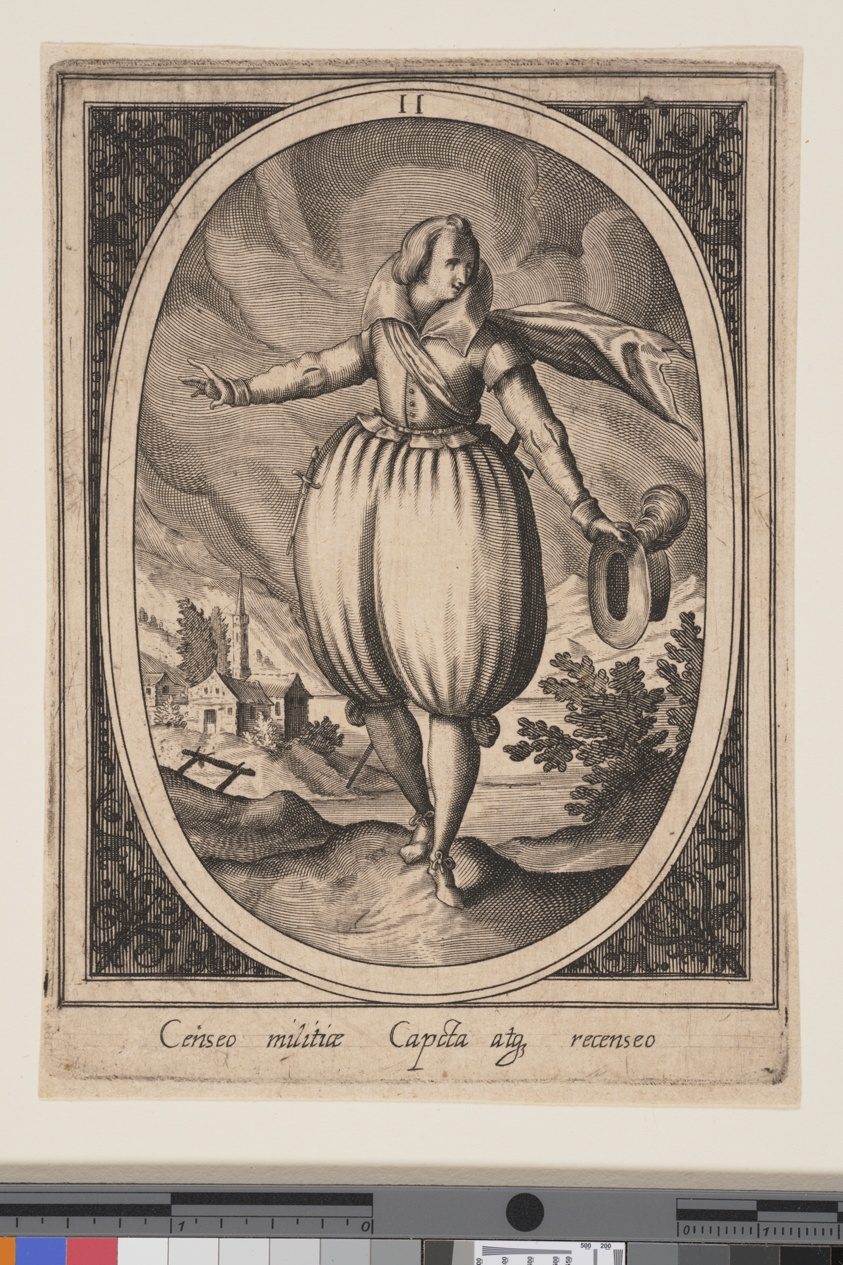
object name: Print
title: Plate 11 from Military Figures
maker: Attriuted to Heinrich Ulrich (German, c. 1572-1621); possibly after Paul Mair (German, active c. 1600)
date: c. 1590-1610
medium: Engraving on ivory laid paper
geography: Germany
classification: engraving; paper; print; prints and drawing